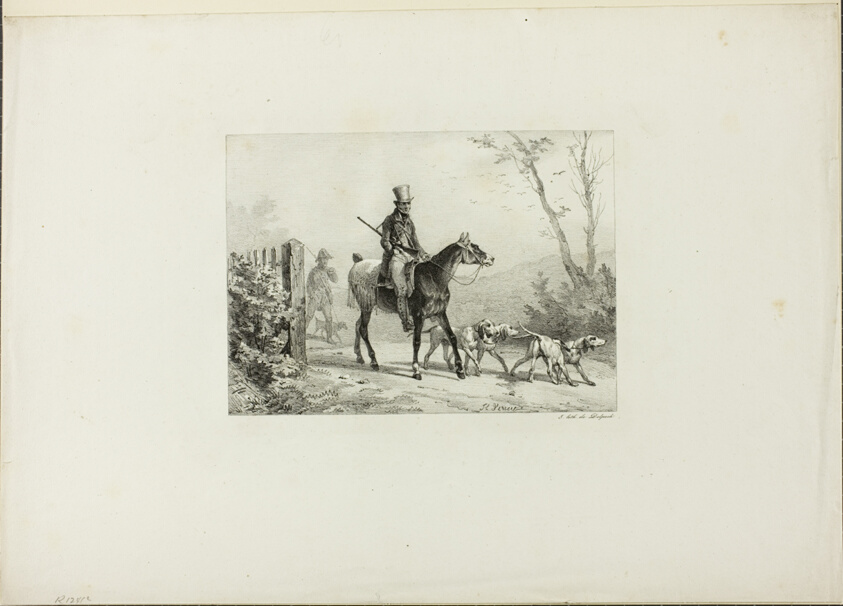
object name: Print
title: Caught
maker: Horace Vernet (French, 1789-1863); printed by Francois Seraphin Delpech (French, 1778-1825)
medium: Lithograph in black on ivory wove paper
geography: France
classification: lithograph; print; prints and drawing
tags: dogs, animals